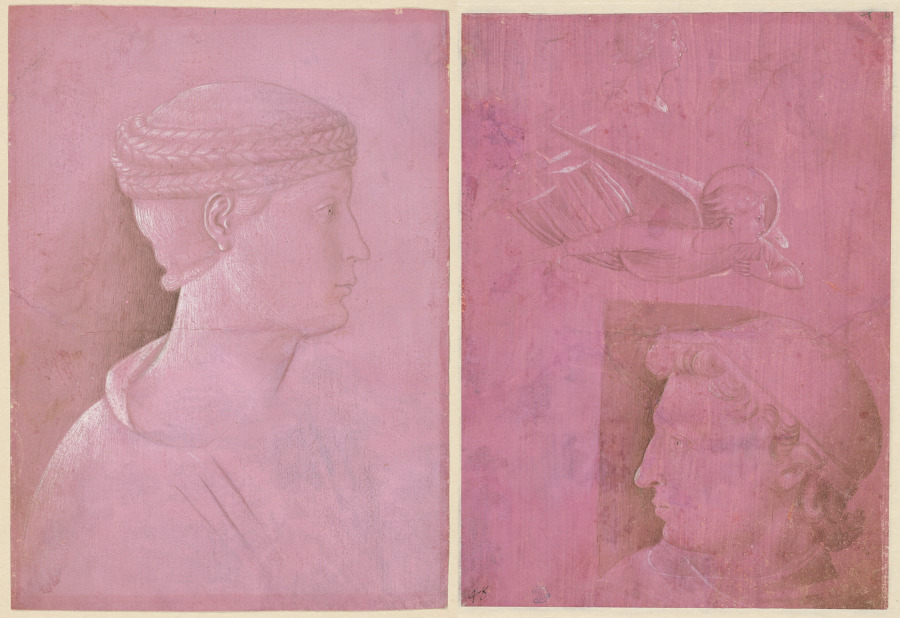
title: Bust of a Woman (recto); Head of a Man, Two Studies of a Woman's Profile, and a Study of An Angel (verso)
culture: Italy, 15th century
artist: Benozzo Gozzoli (Italian, 1420–1497)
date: c. 1458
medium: metalpoint with point of brush and brown ink heightened with white gouache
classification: Drawing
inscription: in brown ink, lower left (v): "46"